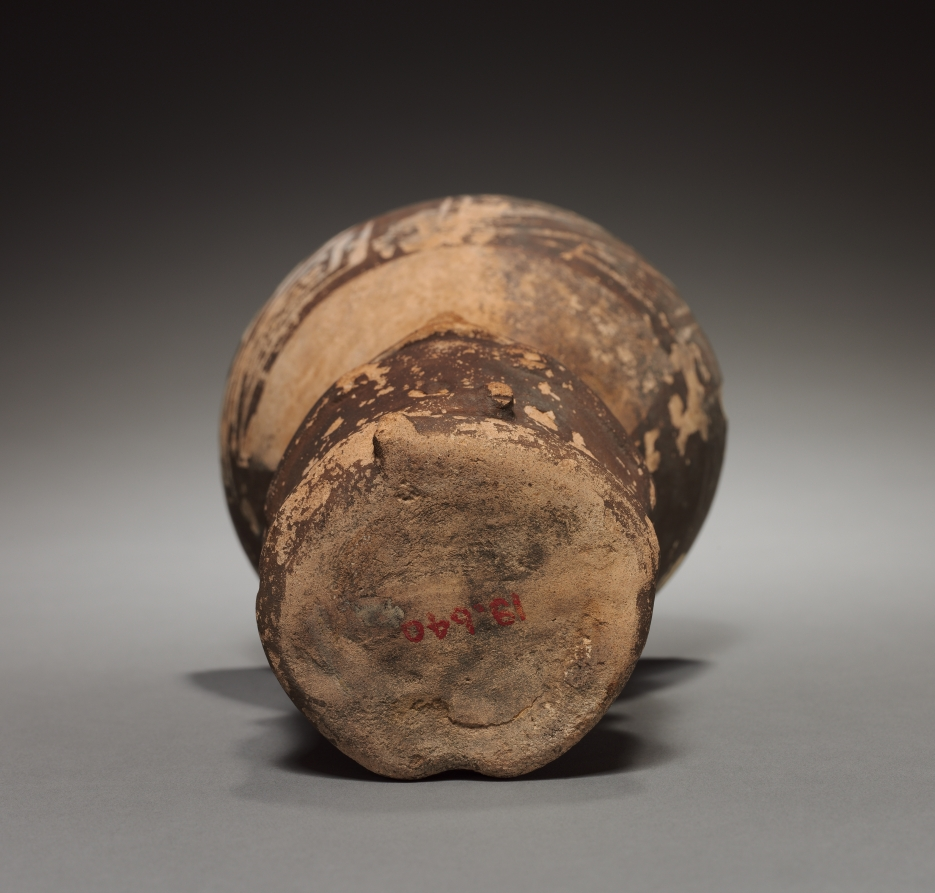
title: Bottle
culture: Peru, Pachacamac, 9th-12th Century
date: 800–1150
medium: pottery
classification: Ceramic